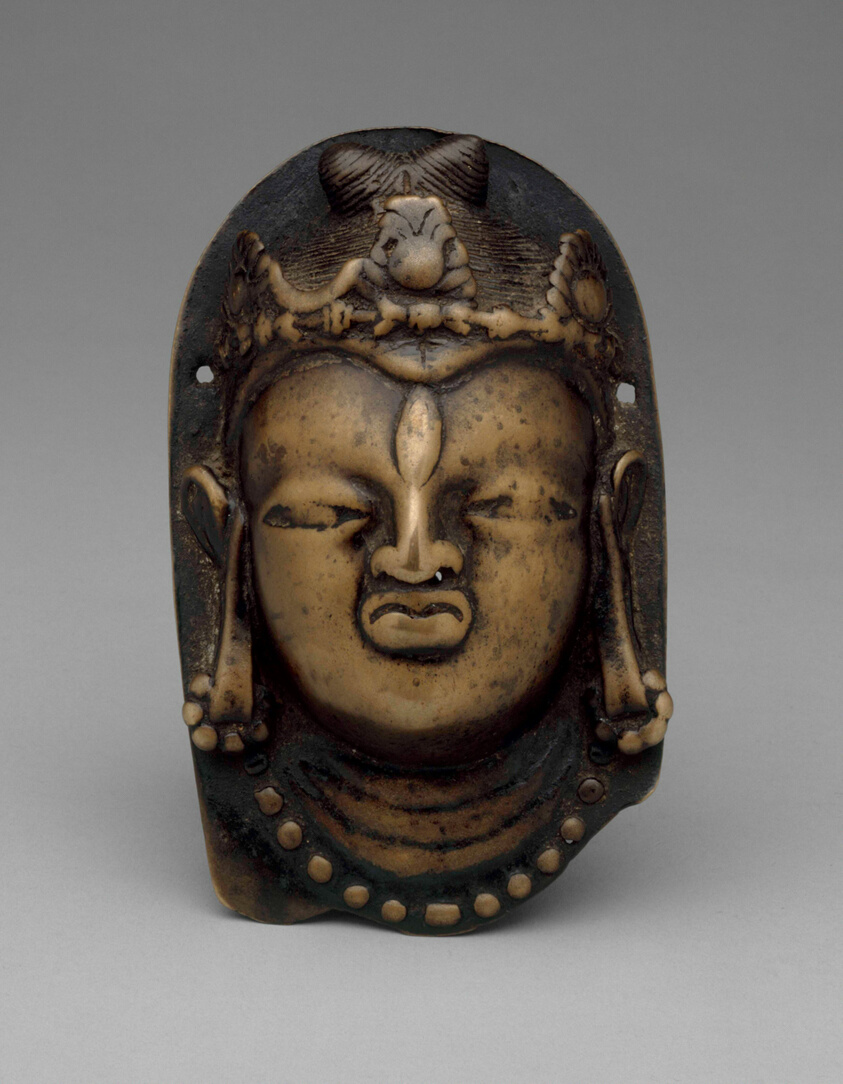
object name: Religious/Ritual Object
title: Linga Cover with Head of God Shiva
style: South Asian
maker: India; Himachal Pradesh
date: 8th/9th century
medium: Brass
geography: Himachal Pradesh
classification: brass; metal; sculpture; asian art; ritual objects